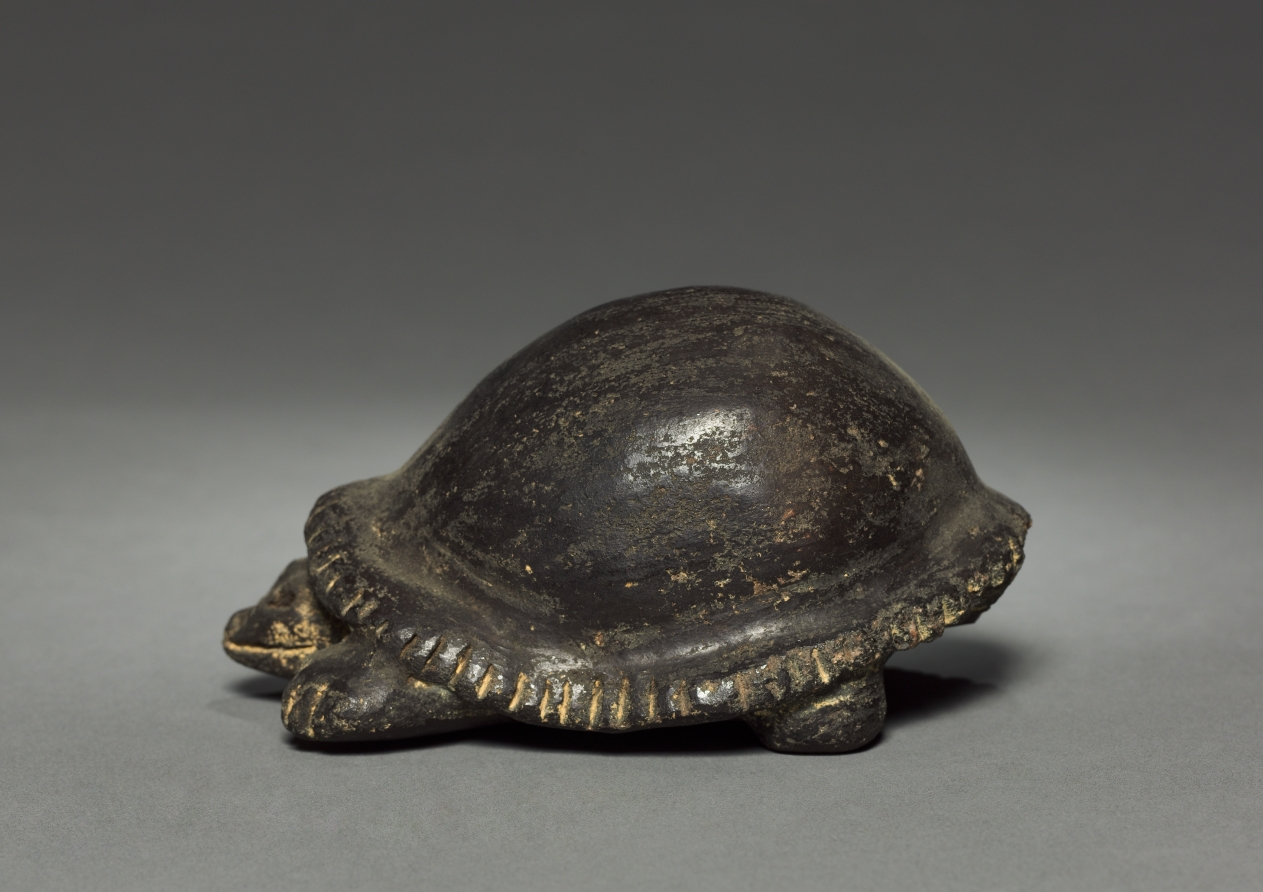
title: Turtle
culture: Colombia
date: before 1921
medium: pottery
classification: Ceramic